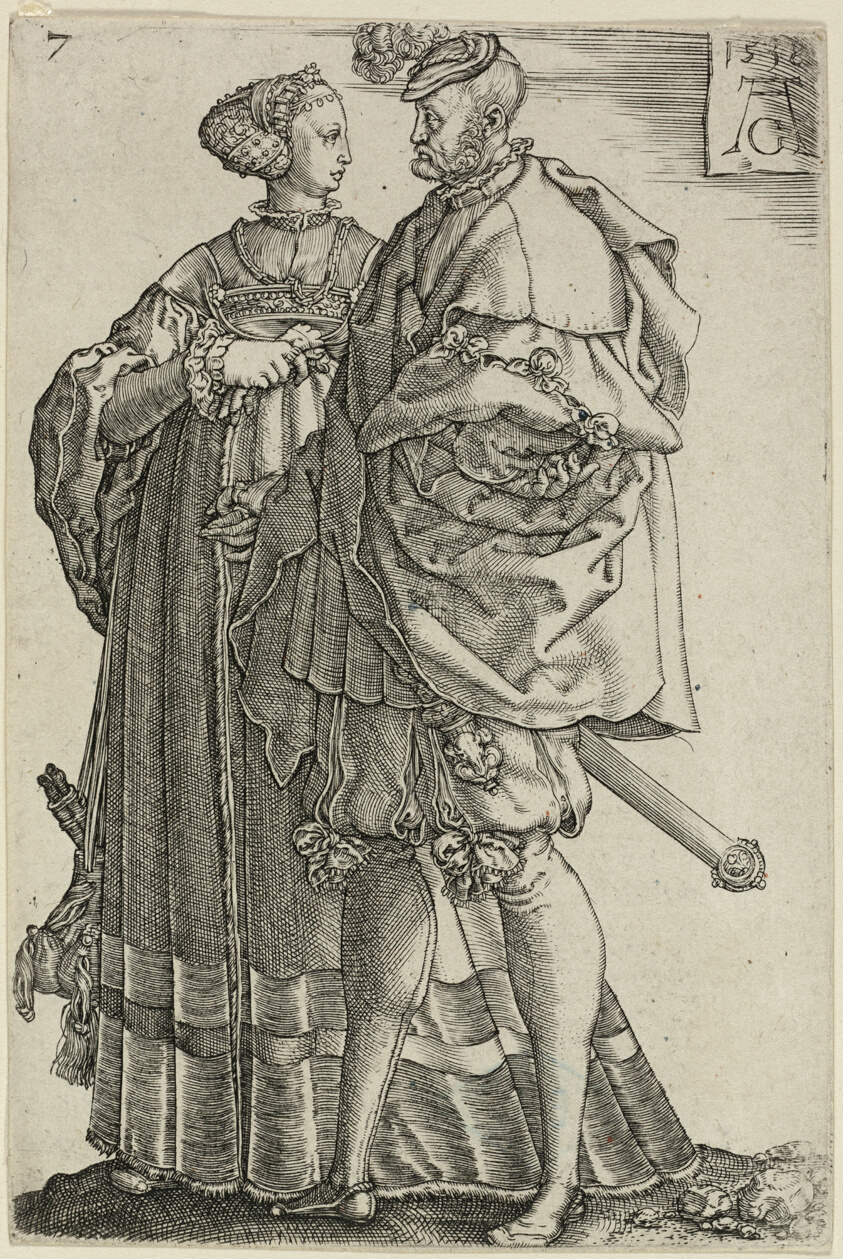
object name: Print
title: Dancing Couple, plate seven from The Large Wedding-Dancers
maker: Heinrich Aldegrever (German, 1502-c.1560)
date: 1538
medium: Engraving in black on ivory laid paper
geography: Germany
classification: engraving; print; prints and drawing